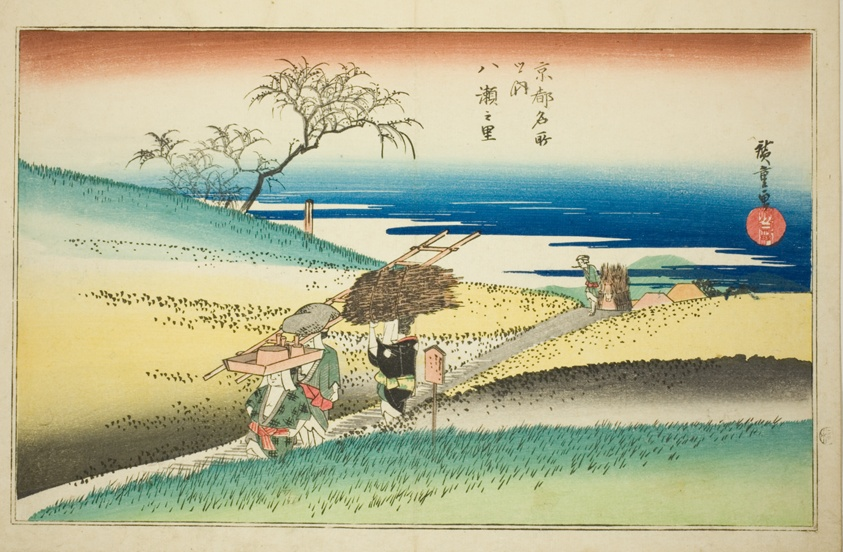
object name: Print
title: The Village of Yase (Yase no sato) from the series "Famous Places in Kyoto (Kyoto meisho no uchi)"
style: Japanese (culture or style)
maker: Utagawa Hiroshige 歌川 広重; Japanese, 1797-1858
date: c. 1834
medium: Color woodblock print; oban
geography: Japan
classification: woodblock print; print; asian art